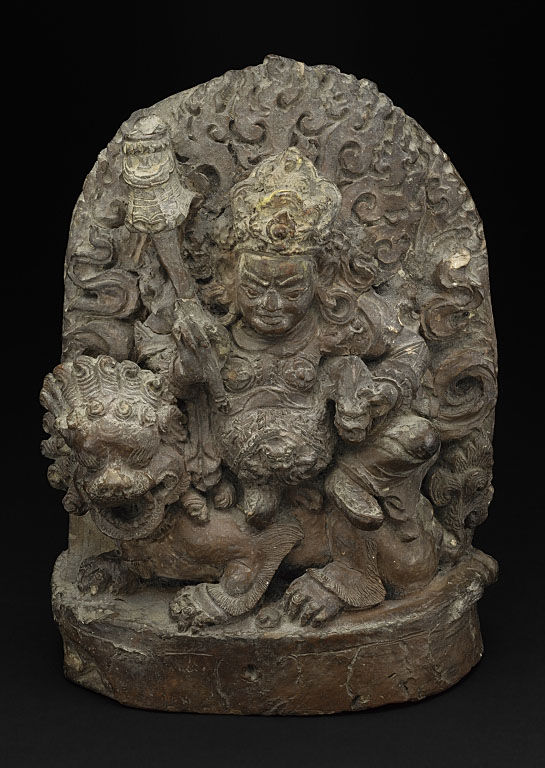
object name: Sculpture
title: Guardian King Vaishravana on His Lion Mount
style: Himalayan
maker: Nepal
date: 17th century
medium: Terracotta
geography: Nepal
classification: earthenware; ceramics; sculpture; asian art